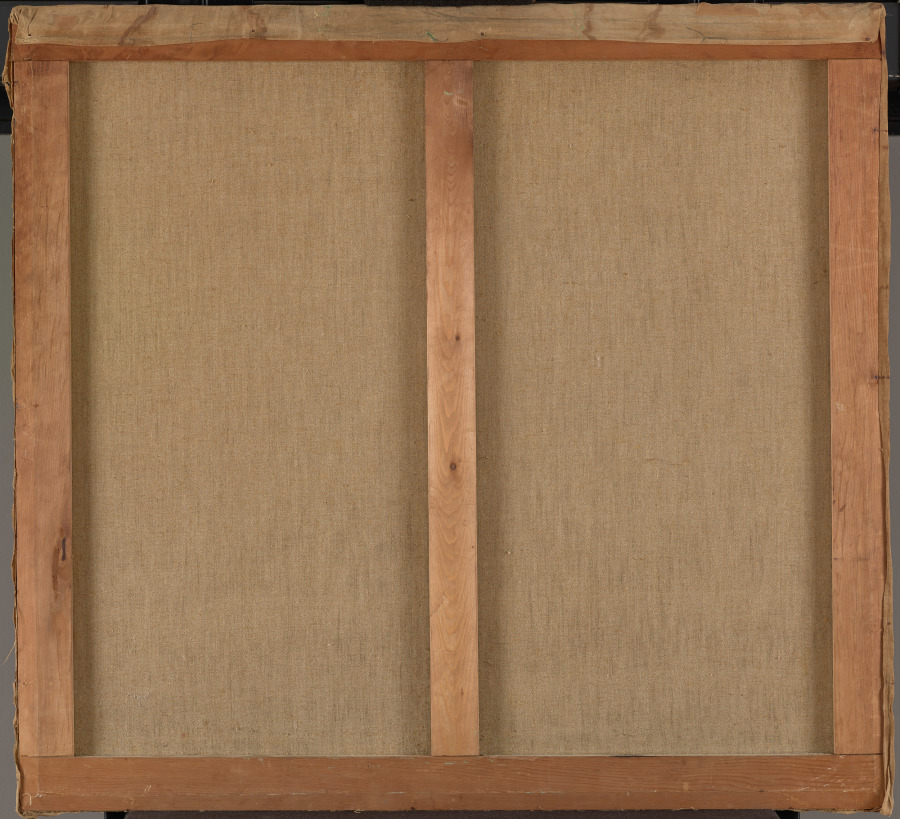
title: Christ Gathering Roses, Centerpiece of an Altar Cloth(?)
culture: Germany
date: early to mid-1400s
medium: Linen: plain weave; silk: embroidery (split stitch)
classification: Embroidery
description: The altar cloth was probably made for a southern German convent in the 15th century. While the focus on the Christ child is typical for female spirituality in the late Middle Ages, there are no comparative examples for the Christ child picking flowers. The detailed depiction of plants and flowers is of unusual quality for the embroideries of this period.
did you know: The Christ child has put aside his globe to devote himself entirely to picking flowers.